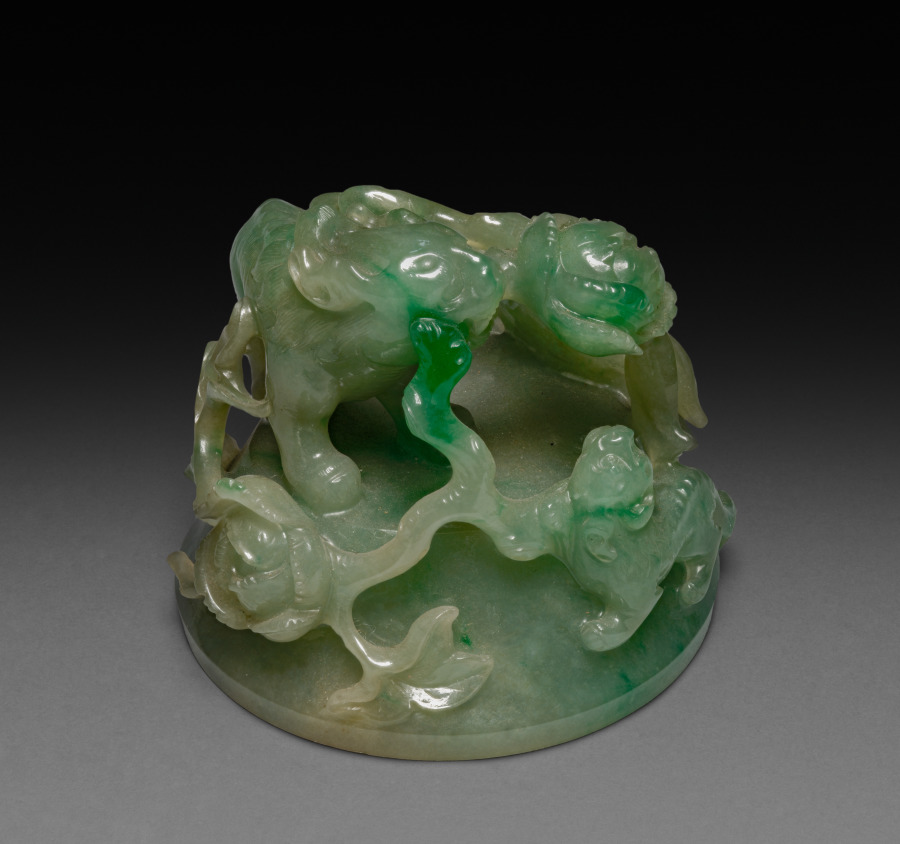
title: Tripod Vase: Ting (cover)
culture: China, Qing dynasty (1644-1911)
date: 1644–1911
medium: jade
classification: Jade